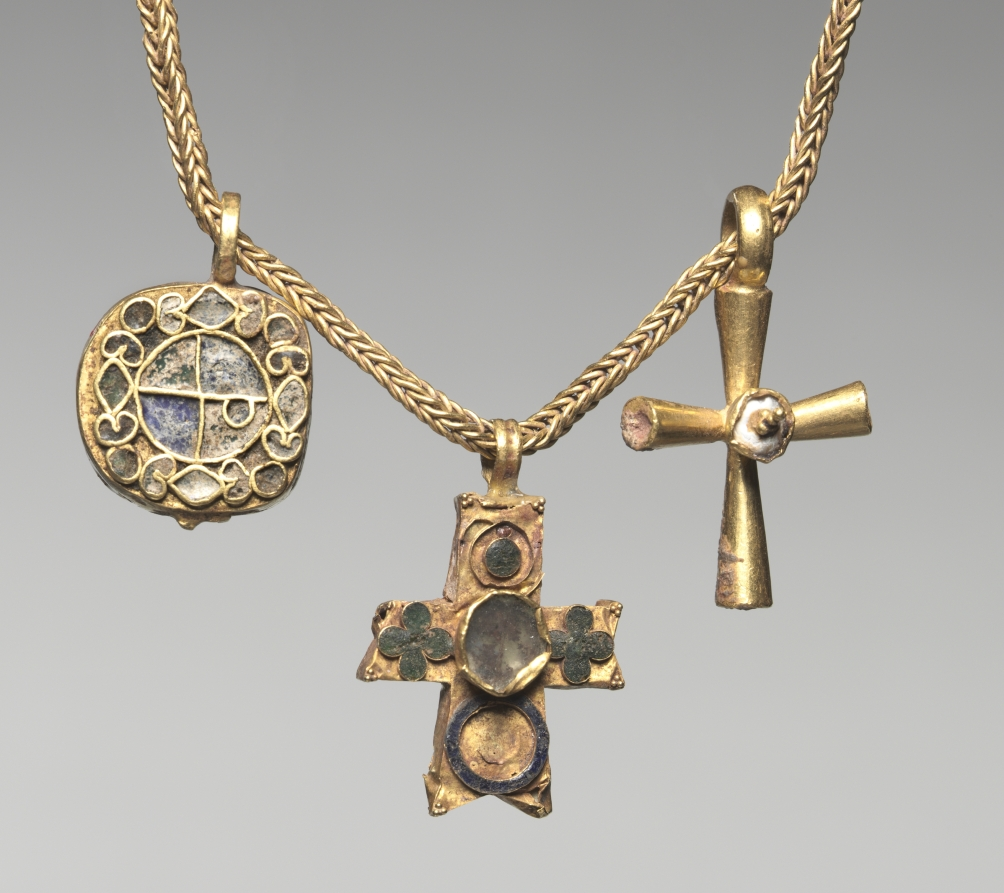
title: Chain with Pendant and Two Crosses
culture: Byzantium, Syria(?), Byzantine period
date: early 500s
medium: gold with enamel and glass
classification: Jewelry